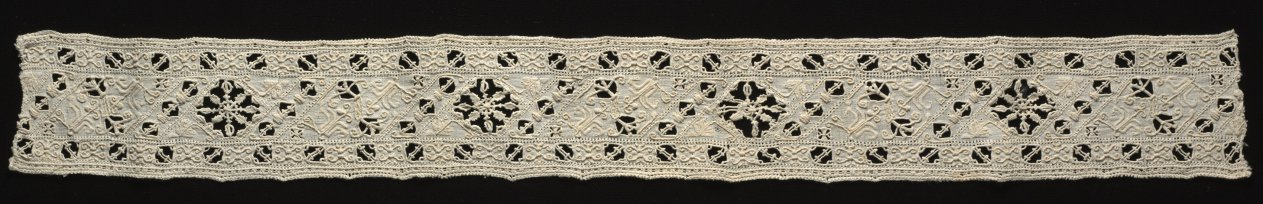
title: Lace Band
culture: Italy, 1560-1699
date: 1560–1699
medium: Linen: needle lace (cutwork) insertion and embroidery (curl stitch and satin stitch)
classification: Lace